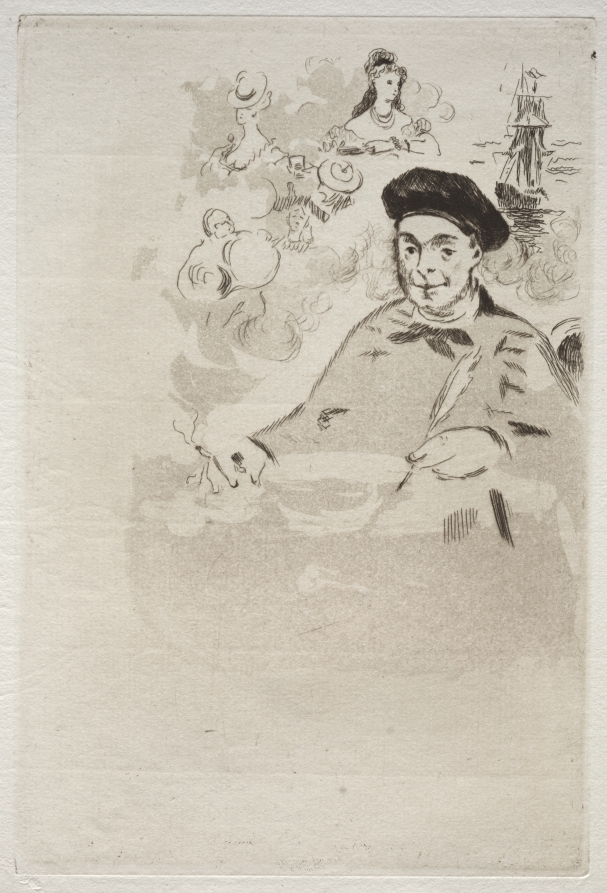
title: Frontispiece for an edition of Les Ballades by Theodore de Banville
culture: France, 19th century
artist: Édouard Manet (French, 1832–1883)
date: 1874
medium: etching and aquatint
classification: Print